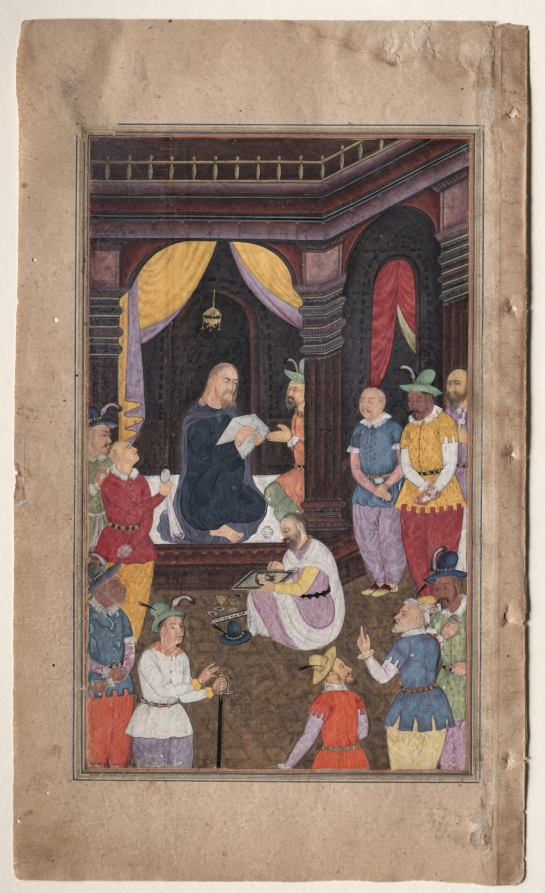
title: Jesus being portrayed by King Abgar’s painter (folio 143 recto), from a Mirror of Holiness (Mir’at al-quds) of Father Jerome Xavier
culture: Mughal India, Allahabad, made for Prince Salim (1569–1627)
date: 1602–4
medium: Gum tempera, ink, color, and gold on paper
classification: Manuscript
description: Jesus sits under a golden lamp with a cloth in his hand, while an artist sits before him, struggling to paint his portrait. The artist had been sent by his king, Abgar of Edessa, who was ill and believed the portrait would cure him. Jesus pitied the artist and pressed his face to the cloth to create a perfect impression. The miraculous cloth became known as the Mandylion and was venerated by Christians as a relic of Christ. The similarity between the names Abgar and Akbar suggests that Father Jerome included this noncanonical story in his biography of Jesus to resonate with and inspire the Mughal emperor.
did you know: Artist’s pigments are arranged in shells next to the brass cup for water.